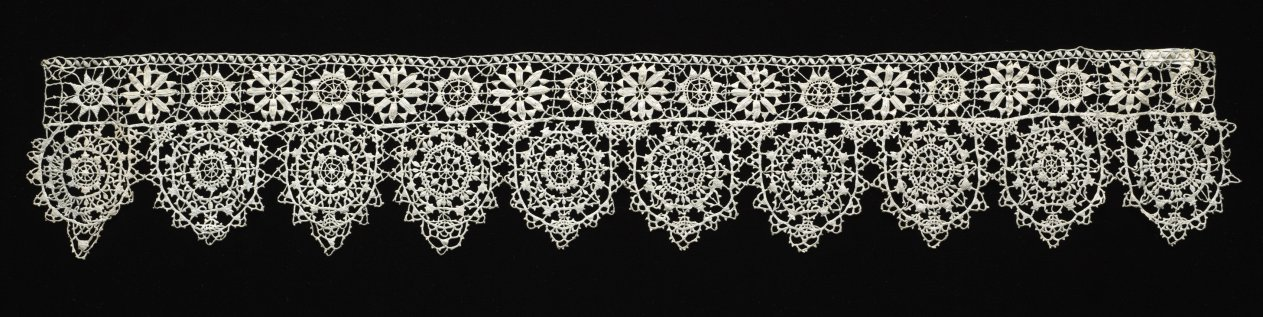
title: Lace Fragment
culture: Italy, Genoa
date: 1550–99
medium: Needle lace (reticella) insertion and edging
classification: Lace